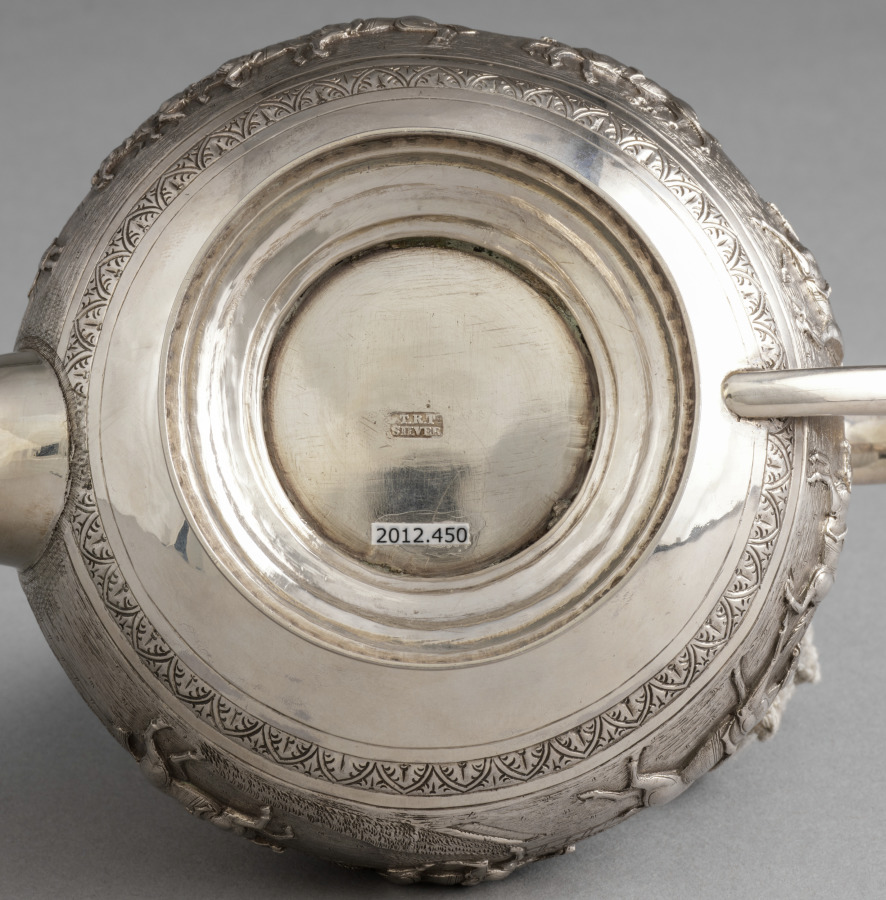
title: Teapot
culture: India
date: c. 1860–90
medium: silver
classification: Silver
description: Made either for export or to appeal to the British community living in colonial splendor in India, this pot is a rare testament to the influence of the British Empire on consumer design during the period. Shri Lakshmi, the Hindu goddess of wealth, crowns the vessel as an apt divinity to preside over the horse races depicted on the belly of the teapot.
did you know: The Hindu goddess of wealth on the lid has four arms, two of which hold lotus flowers.